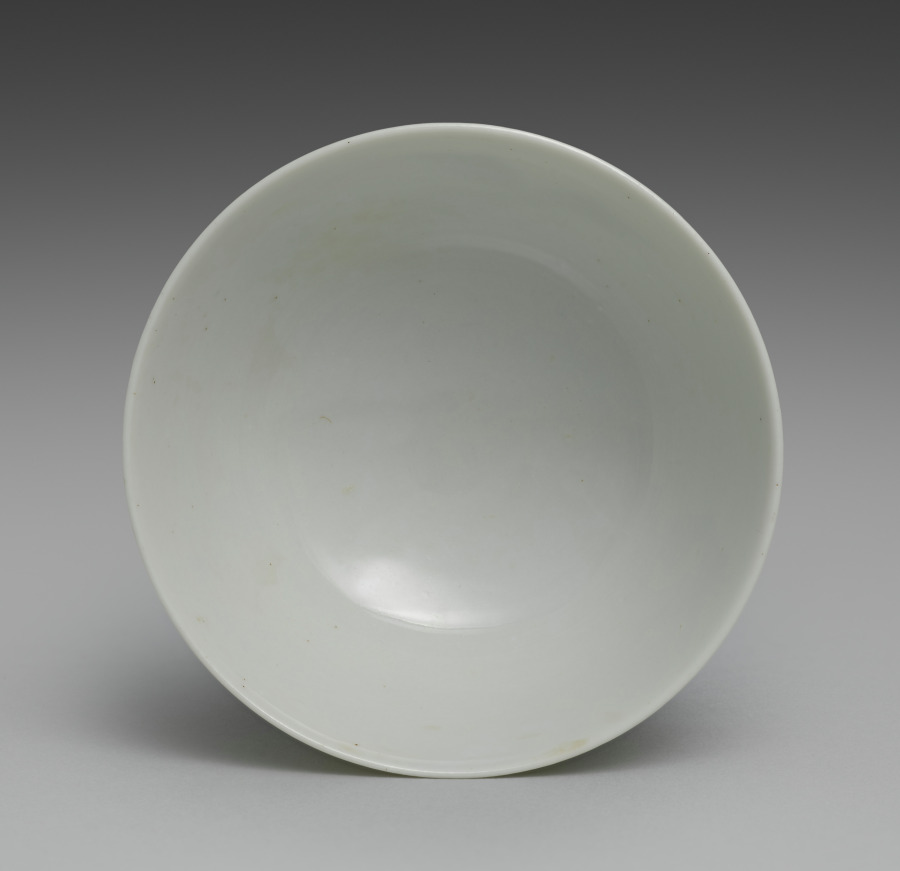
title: Teabowl from Teabowls with Peony and Crabapple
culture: Japan, Meiji period (1868–1912)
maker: Seifū Yohei III (Japanese, 1851–1914)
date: 1893–1914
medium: One from a set of five teabowls; porcelain with underglaze and overglaze color enamels and gold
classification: Ceramic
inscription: 清風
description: Overglaze color enamels are generally called iro-e (literally “color picture”) in the terminology customarily used for porcelain decoration of the Edo period. This set of teabowls is a fine example of Yohei III’s skilled use of the technique, which is identified on this set’s box lid with the alternate phrasing “porcelain with color painting” (jisaiga). Distinct from the way overglaze colors were used in Kakiemon ware from Arita, his designs and applications show a consciousness of porcelain decoration of the Qing dynasty. Here, he combines Chinese models with a sensibility taken from Kyoto ware precedents, including painting with powdered gold (kinrande). The colors used in the bowls are as follows: blue, black, gold, white, light green, green, and pink. The black iron, used for stems and leaf veins, is painted over the glaze. The gold, also painted over the glaze, is used for leaves and the centers of flowers, for solid, glossy lines defining detail, or as a semimatte ground. The white of the peony flower is built up to a low relief over the glaze. Yohei has incised lines of varying widths into the pigment, carving away to the bowl’s surface, to differentiate individual petals and their rippled shapes. The light and dark greens, as well as the pink, are painted over the glaze. Of note is how Yohei has first used thinly applied lines of light green to draw the plum branch before applying the opaque iron black. For the plum buds and flowers, he has used a diluted pink with an opaque pink for outline, both over the glaze. In his later works, Yohei used pink both over and under the glaze in a manner similar to underglaze blue, and it can be challenging in some cases to discern which technique he has used. A lidded container in a private collection has a similar design but is augmented with the inclusion of white and purple magnolia blossoms. In contemplating the original decorative program of a set, of which these teabowls may have been a part, it is worth considering that perhaps not all objects included the full range of motifs. In such cases, the composition of the individual object may be best understood within the context of the extended ensemble. Here, the delicate pink plum on one side of the bowl seems slightly unbalanced with the bold white peony on the other, but when seen with other objects with the magnolia and its additional colors and shapes, it is possible to imagine a set with a complex, balanced design across multiple pieces.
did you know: Blue appears only inside the footring, as a double band of underglaze color.